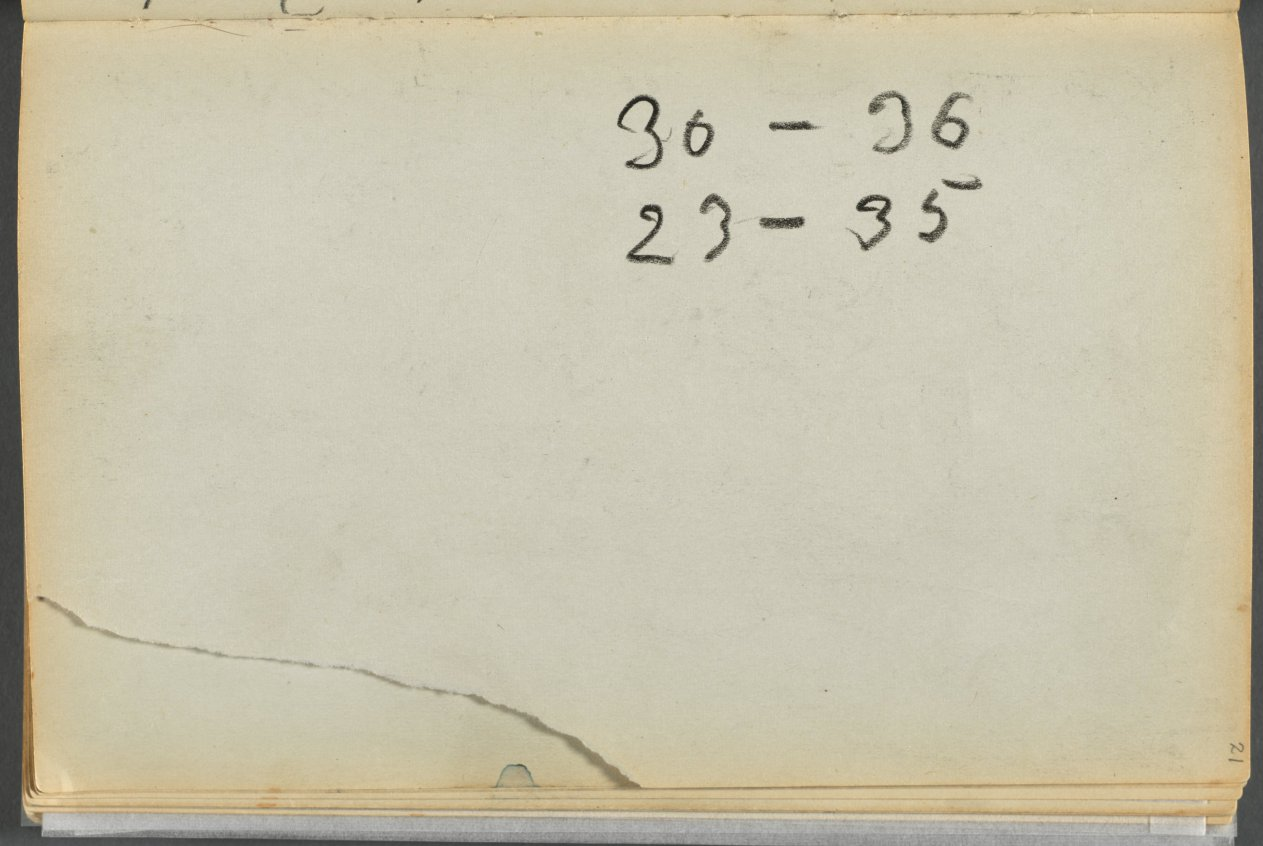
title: Sketchbook- The Granite Shore Hotel, Rockport, page 021: Notes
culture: America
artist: Maurice Prendergast (American, born Newfoundland [now Canada], 1858–1924)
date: 1905–10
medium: graphite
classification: Bound Volume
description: This sketchbook contains 72 pages of pencil drawings and 9 watercolors of Cape Ann. On the inside of the cover Prendergast wrote the address of the Granite Shore Hotel in Rockport, Massachusetts.